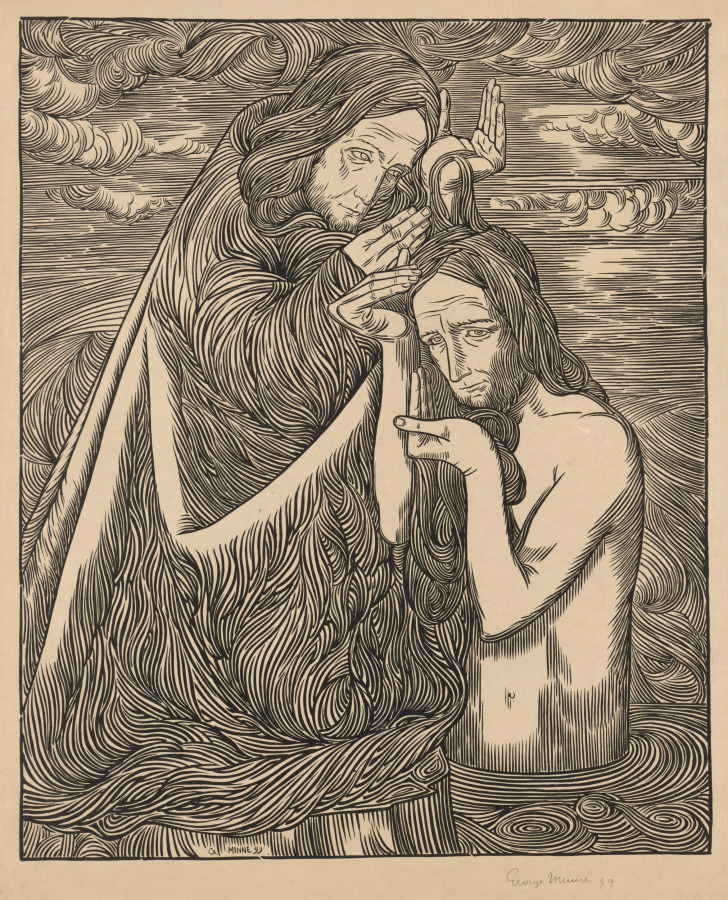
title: The Baptism of Christ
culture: Belgium, 20th century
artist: George Minne (Belgian, 1866–1941)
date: 1899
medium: woodcut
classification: Print